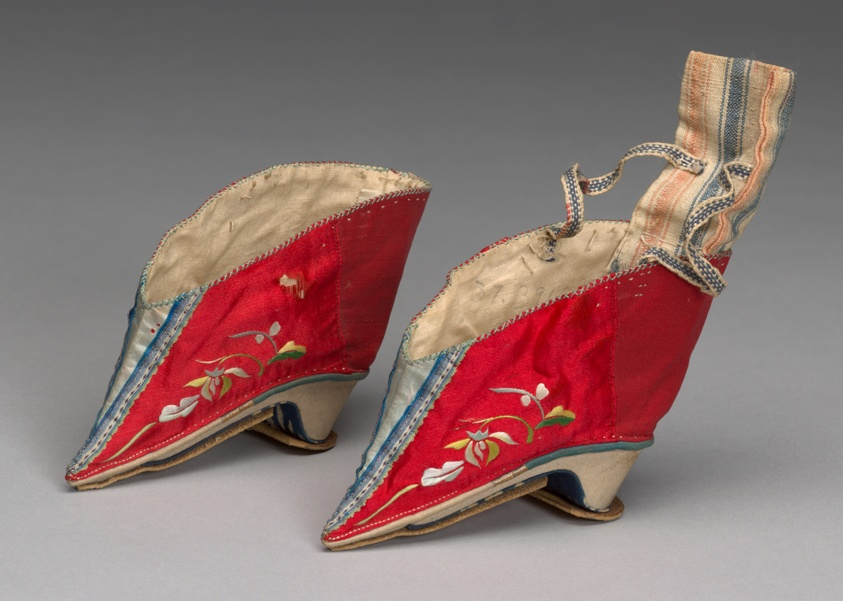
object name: Costume and Accessories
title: Woman's Shoes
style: qing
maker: China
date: Qing dynasty (1644–1911), 19th century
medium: Blue and red sateen, gilt trim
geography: China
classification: textile; shoes - misc; costume accessory - shoe; embroidery; costume; dress (garment); clothing